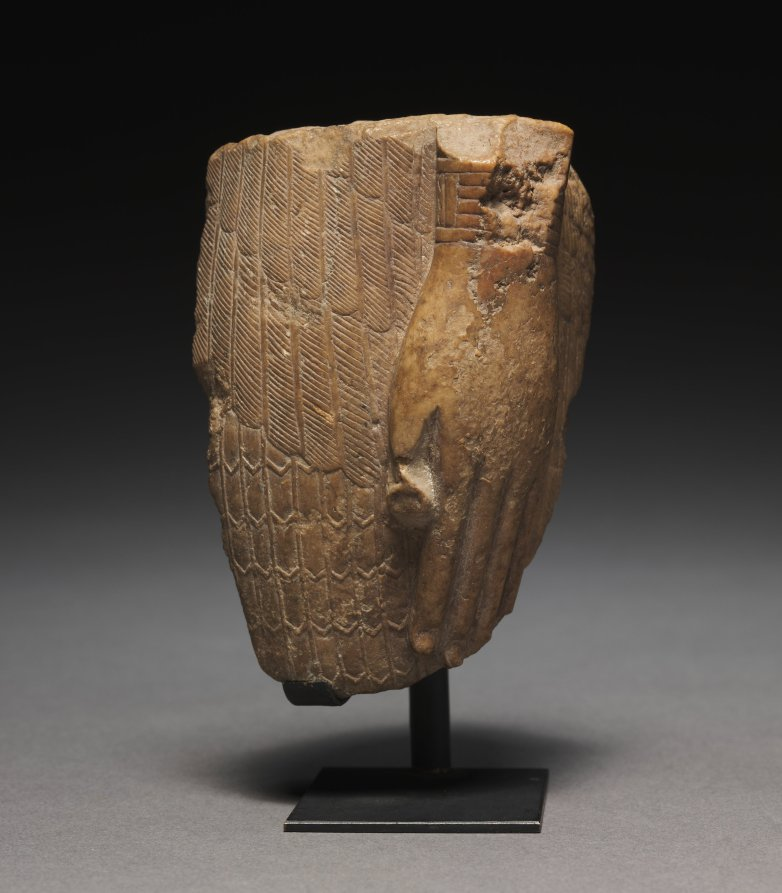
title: Fragment of a Feather-Garmented Figure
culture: Egypt, New Kingdom (1540–1069 BCE)–Third Intermediate (1069–715 BCE)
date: 1540–715 BCE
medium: limestone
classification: Sculpture